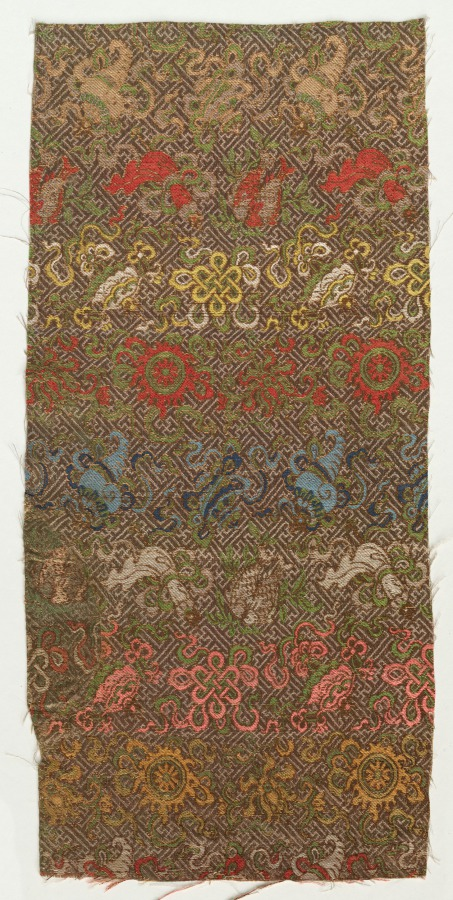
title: Fragment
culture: China, 19th century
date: 1800s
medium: silk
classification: Textile